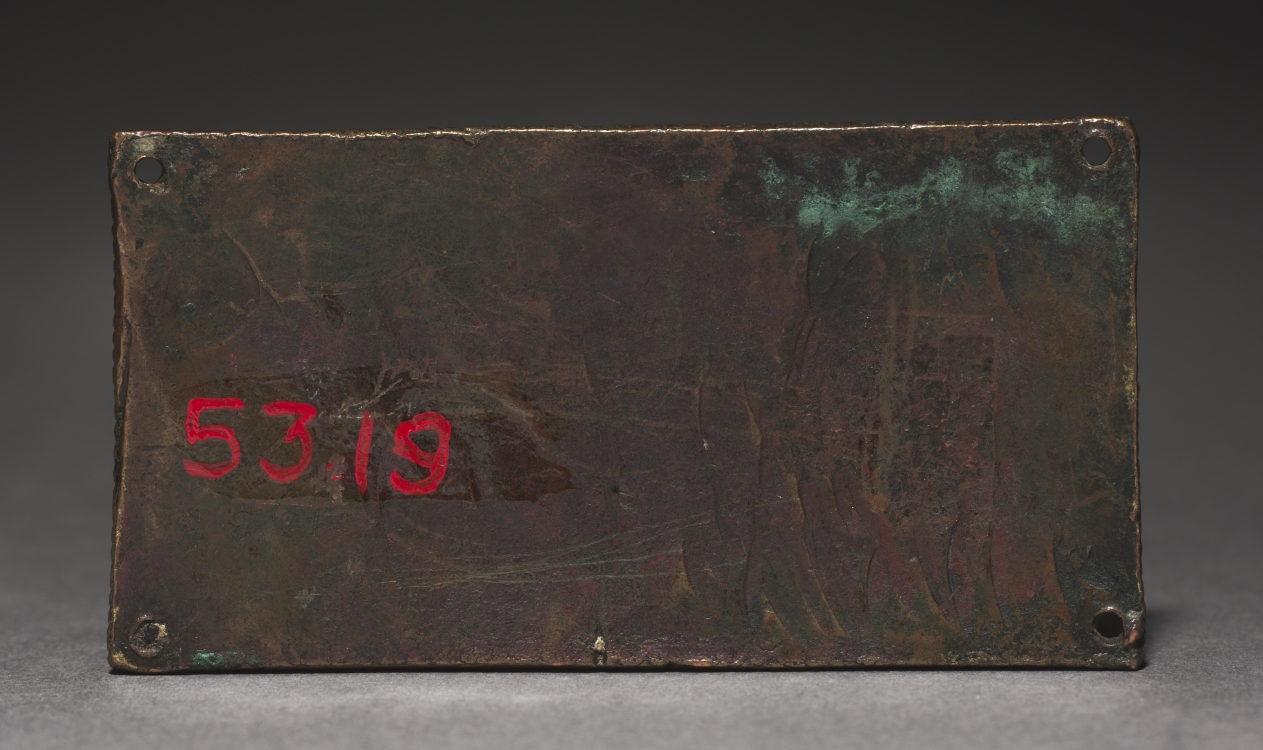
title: Plaque, probably from a Reliquary Shrine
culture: Germany, Aachen?, Gothic period, 13th century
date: 1225–1250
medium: gilded copper; champlevé enamel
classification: Enamel